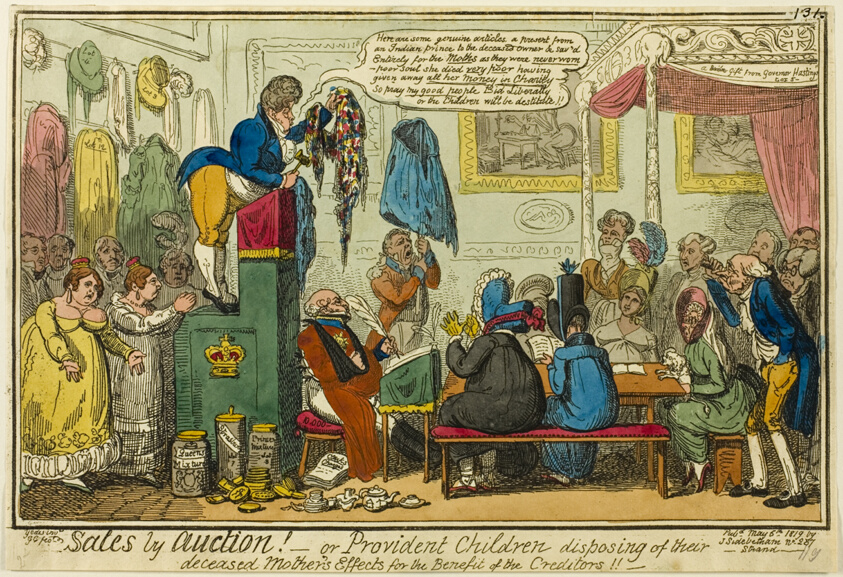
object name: Print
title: Sales by Auction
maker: George Cruikshank (English, 1792-1878); published by J. Sidebotham (English, active 1802-1820)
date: published May 6, 1819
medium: Hand-colored etching on paper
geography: England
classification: etching; print; prints and drawing